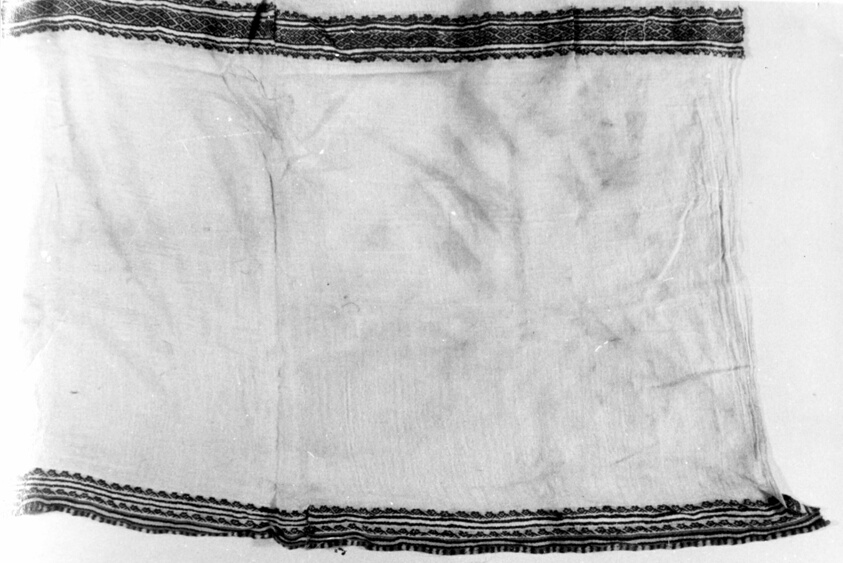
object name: Textile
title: Panel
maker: Peru, Possibly south coast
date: A.D. 1000/1476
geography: Peru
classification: textile; weaving